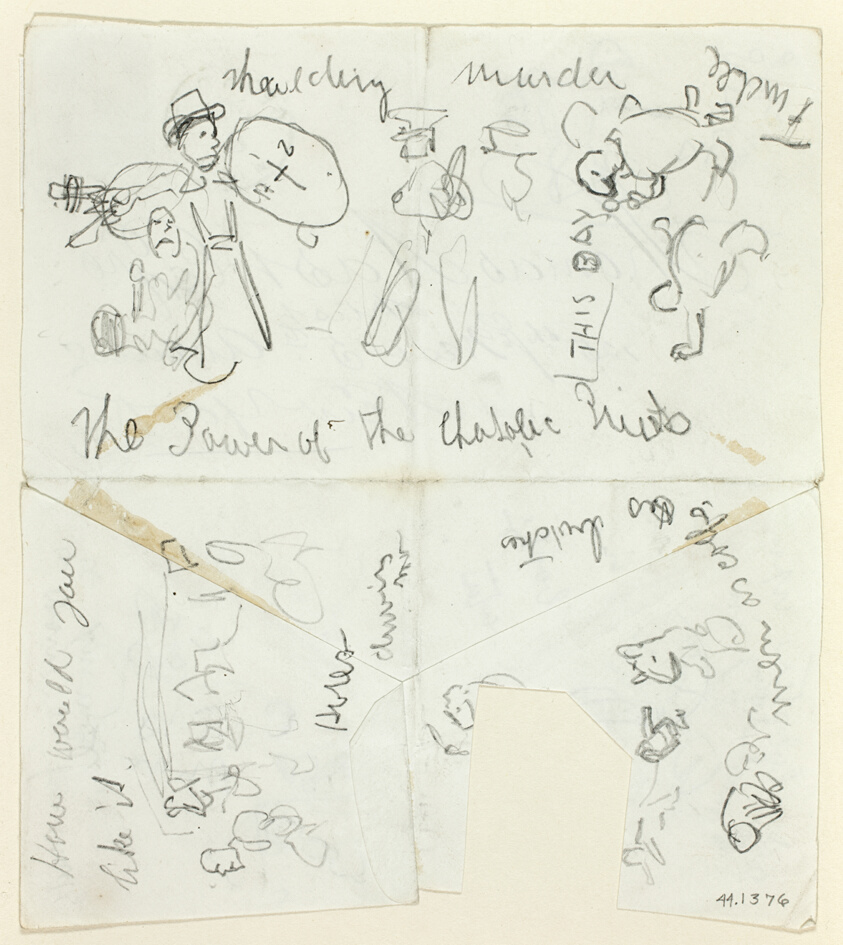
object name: Drawing and Watercolor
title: Sheet of Sketches: The Power of the Catholic Priests (recto); Sheet of Sketches (verso)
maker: Thomas Nast (American, 1840-1902)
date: 1868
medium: Graphite (recto and verso) on ivory laid paper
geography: United States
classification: graphite; paper; drawings (visual works); prints and drawing